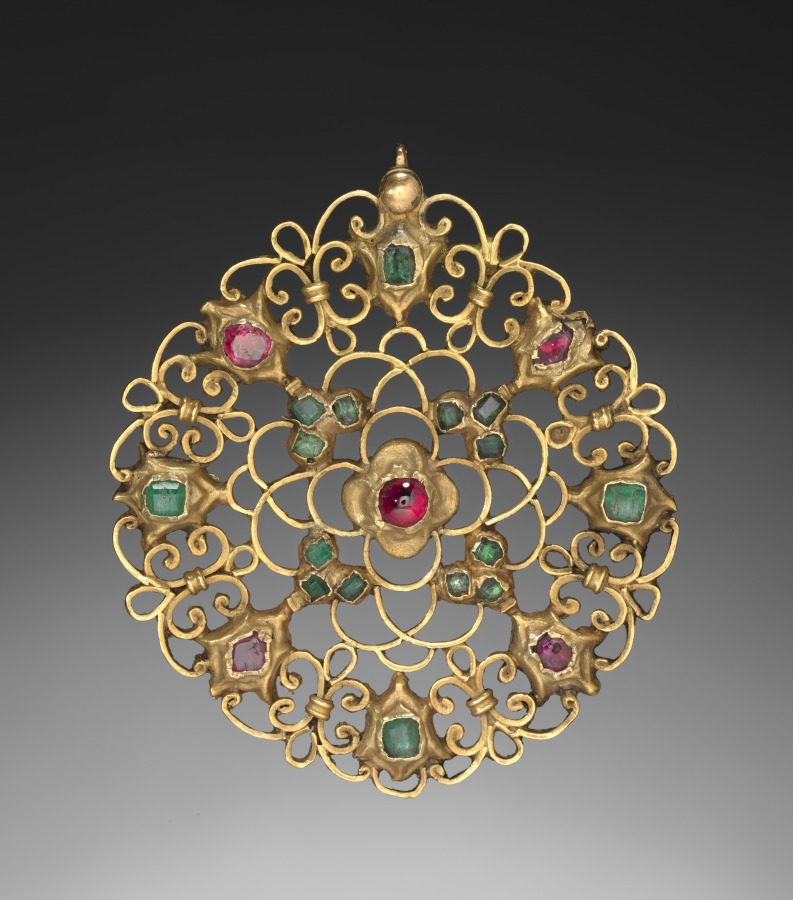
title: Medallion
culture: India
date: 1800s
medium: silver gilt with rubies and emeralds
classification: Jewelry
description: Circular ornaments were worn as pendants, sewn onto textiles, or pinned into hair. The decorative motif made of colorful gems depicting flowering plants was introduced during the reign of the Mughal emperor Shah Jahan (1628–58) and remained popular through the 1800s.